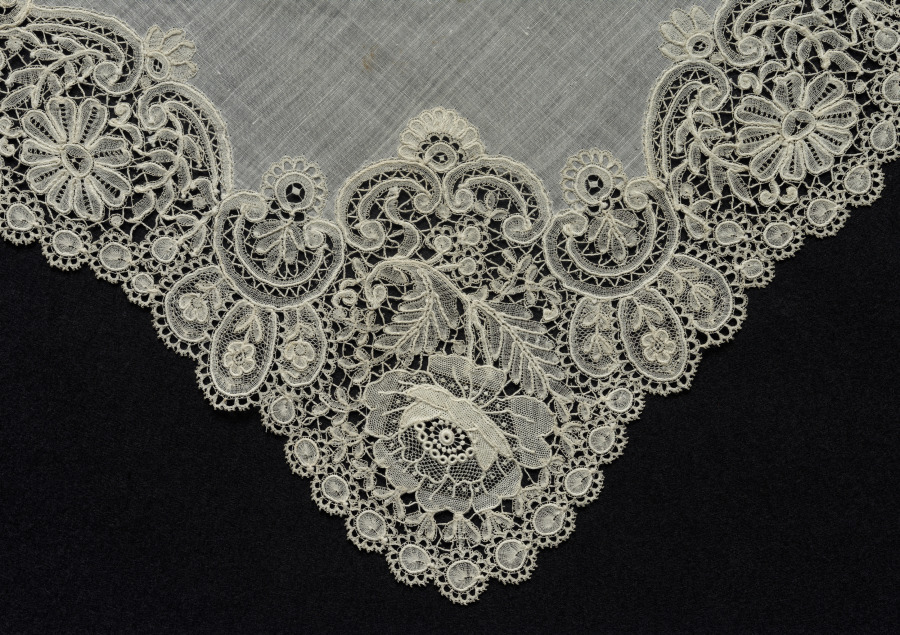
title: Lace Handkerchief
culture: Belgium, Brussels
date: 1800s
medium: Plain weave linen center: bobbin lace (Point Duchesse) and needle lace border, and appliqué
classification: Lace